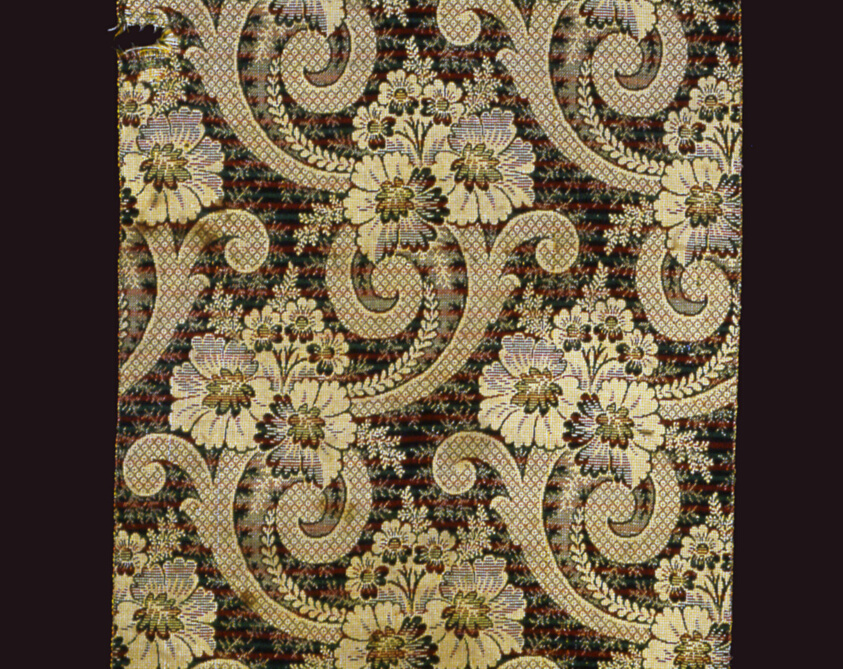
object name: Textile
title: Carpet Strip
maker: United States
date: 1870/1900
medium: Wool, tied and free plain weave double cloth; woven on a loom with Jacquard attachment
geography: United States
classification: textile; weaving - carpet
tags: flowers